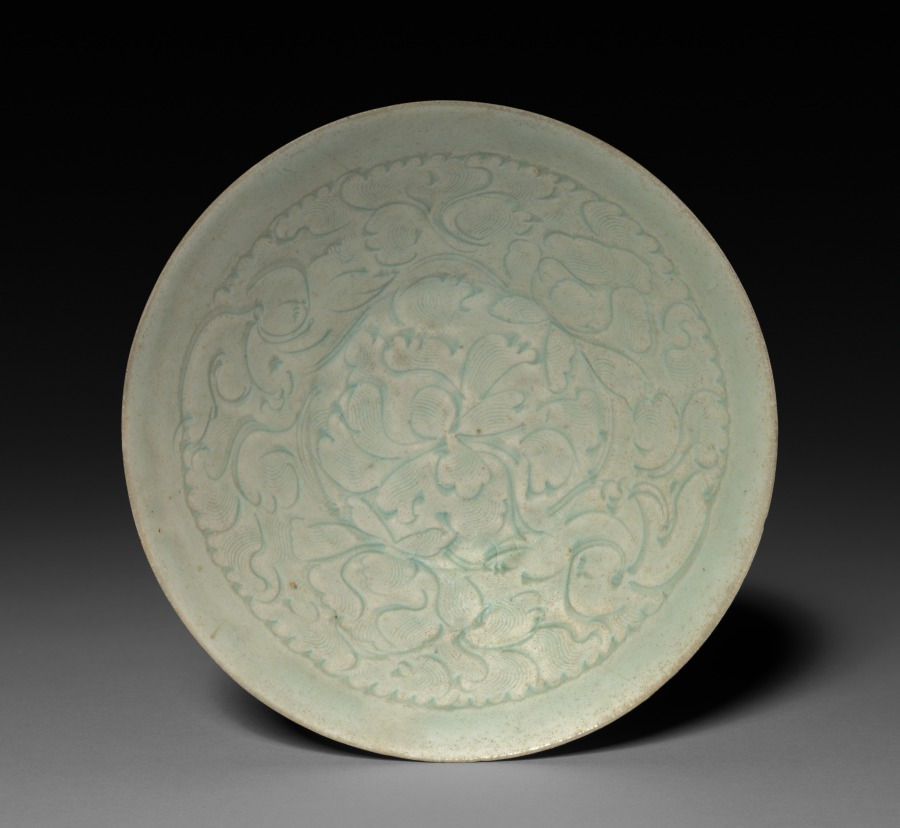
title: Bowl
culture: China, Southern Song dynasty (1127-1279)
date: 1100s–1200s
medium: Glazed porcelain, qingbai ("blue-white") ware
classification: Ceramic